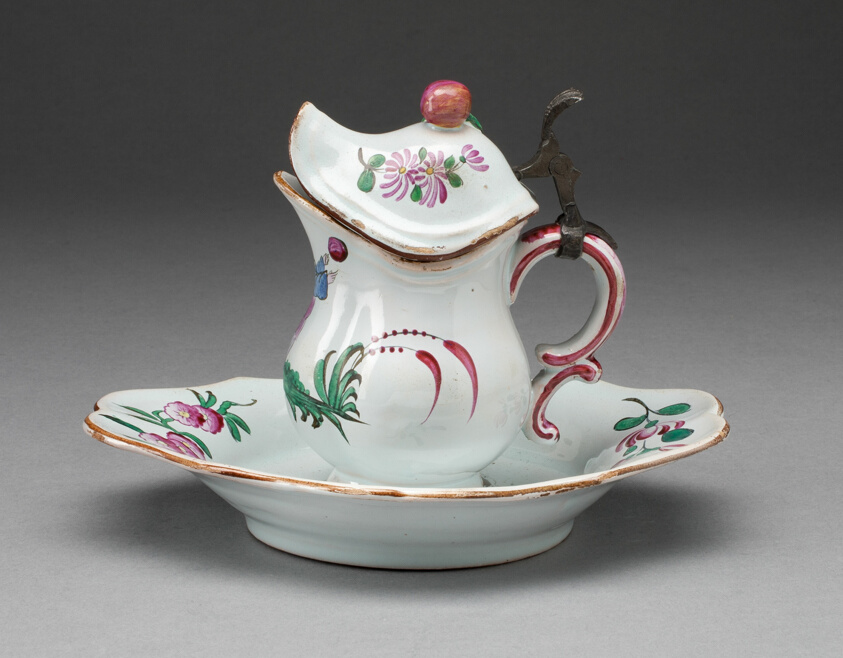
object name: Ceramics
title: Mustard Pot with Stand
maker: France, Strasbourg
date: 1754/1760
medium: Tin-glazed earthenware (faience)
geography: Strasbourg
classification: tin-glazed ware; earthenware; european decorative arts; ceramics